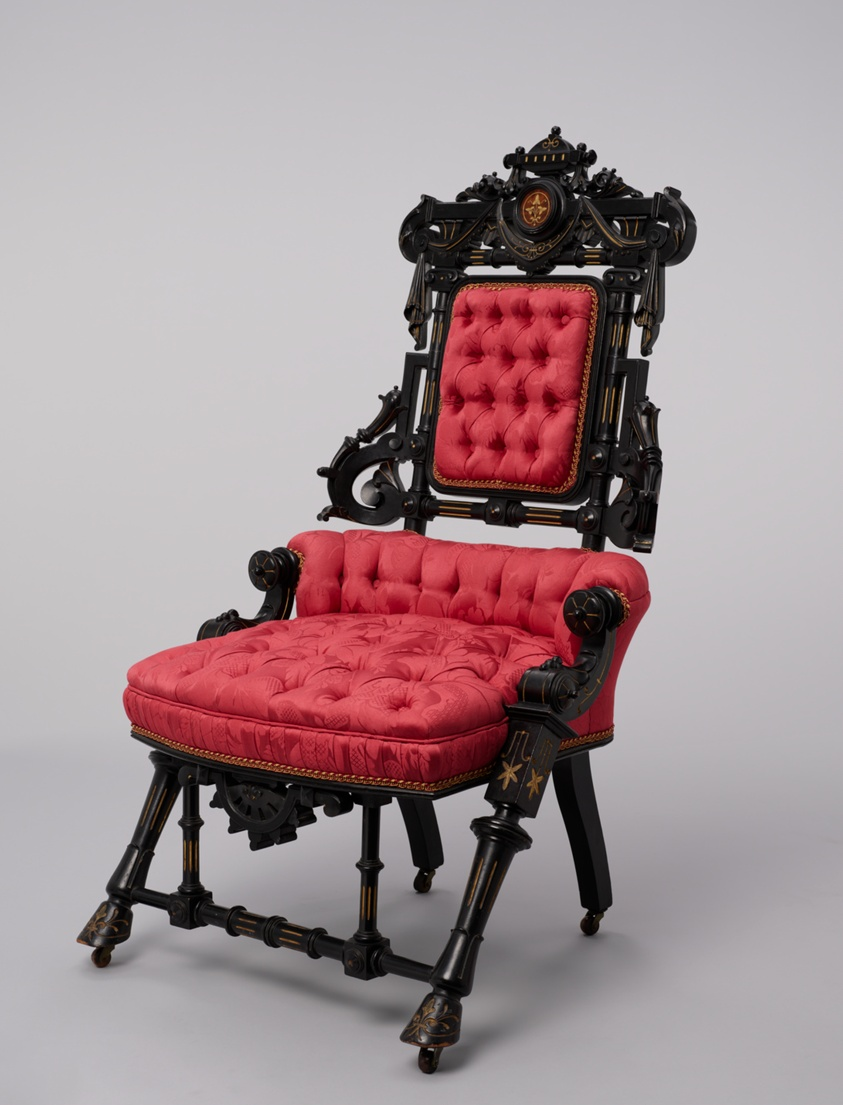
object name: Furniture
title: Armchair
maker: George Jakob Hunzinger (American, born Germany, 1835–1898)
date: About 1869; patented in 1869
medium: Ebonized walnut with gilt decoration and upholstery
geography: New York City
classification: seating; furniture; american decorative arts; american arts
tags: furniture